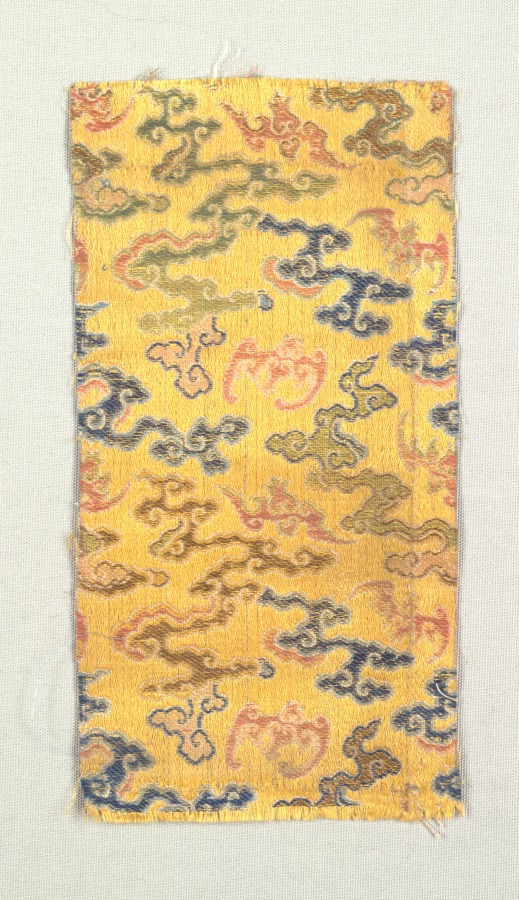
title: Fragments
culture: China, Qing dynasty (1644-1911)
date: 1700–1720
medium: Silk, diaper weave; satin ground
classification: Textile